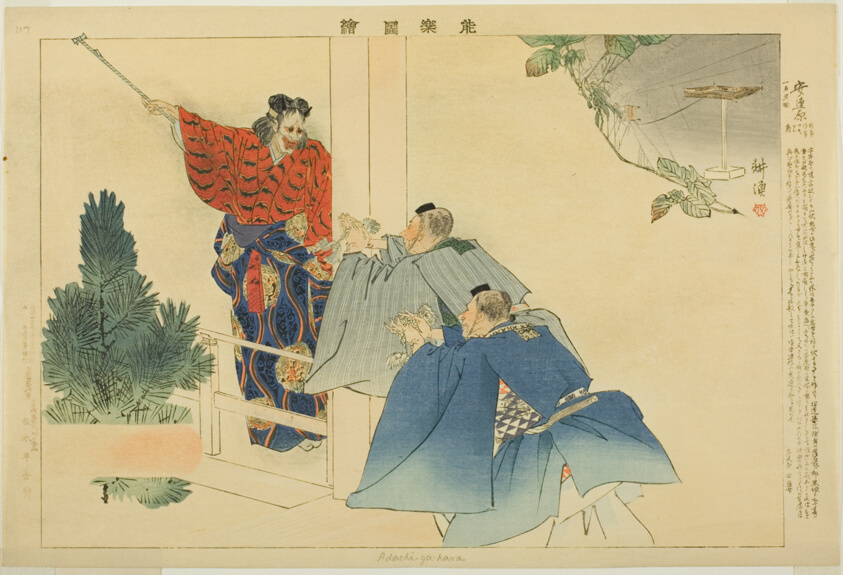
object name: Print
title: Adachiga Hara, from the series "Pictures of No Performances (Nogaku Zue)"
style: Japanese (culture or style)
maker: Tsukioka Kogyo; Japanese, 1869-1927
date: 1898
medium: Color woodblock print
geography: Japan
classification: woodblock print; print; asian art